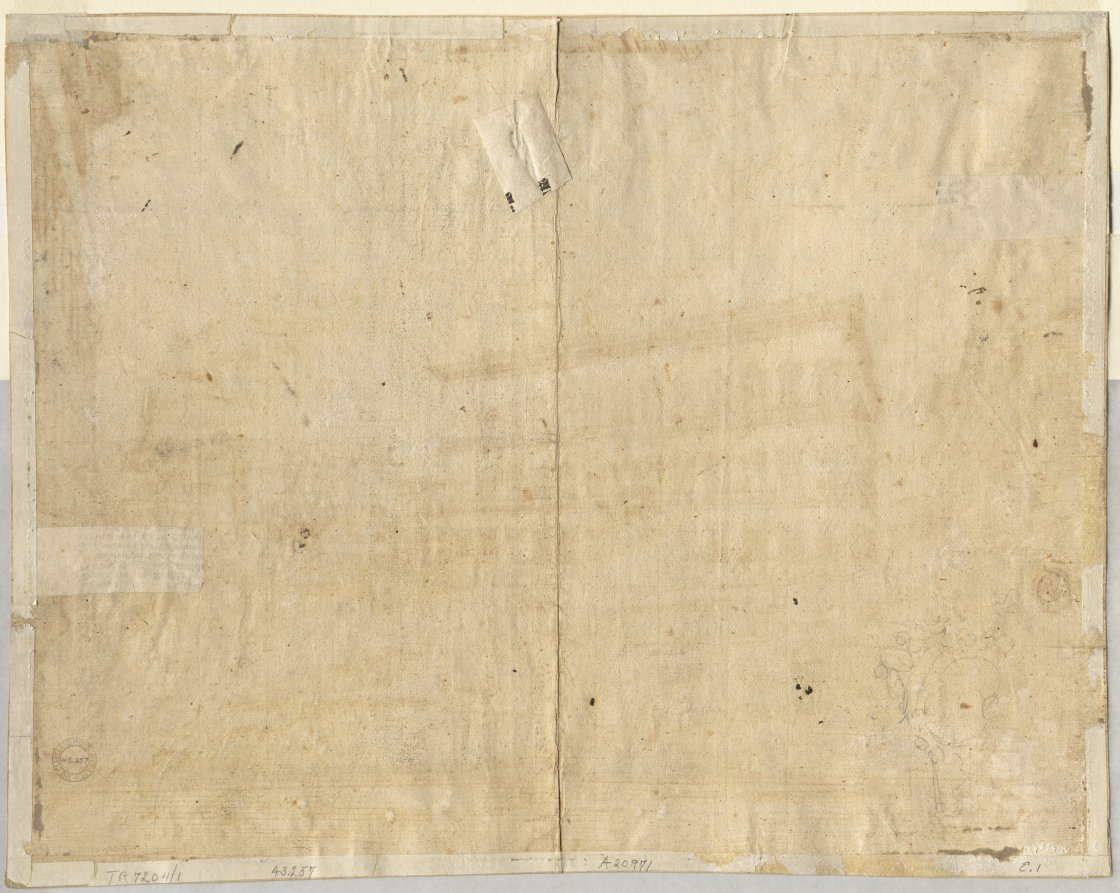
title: Cartouche (verso)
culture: Flanders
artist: Lievin Cruyl (Flemish, c. 1640-c. 1720)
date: 1664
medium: graphite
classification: Drawing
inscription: ON STRIPS OF PAPER MOUNTED TO PERIMETER, lower center, in graphite: A20971 ; lower right, in graphite: E. 1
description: Flemish artist Lieven Cruyl made a number of drawings of emblematic vistas of Rome for the Roman publisher Giovanni Battista de Rossi, of which ten were published as etchings in 1666. The Piazza Farnese features architecture designed by Michelangelo, who completed the Palazzo Farnese after the death of its original designer, Antonio da Sangallo, in 1546. His main contribution was the third story and the significantly protruding cornice at the top of the facade, which dramatically hangs over the front of the building, like sculpture.